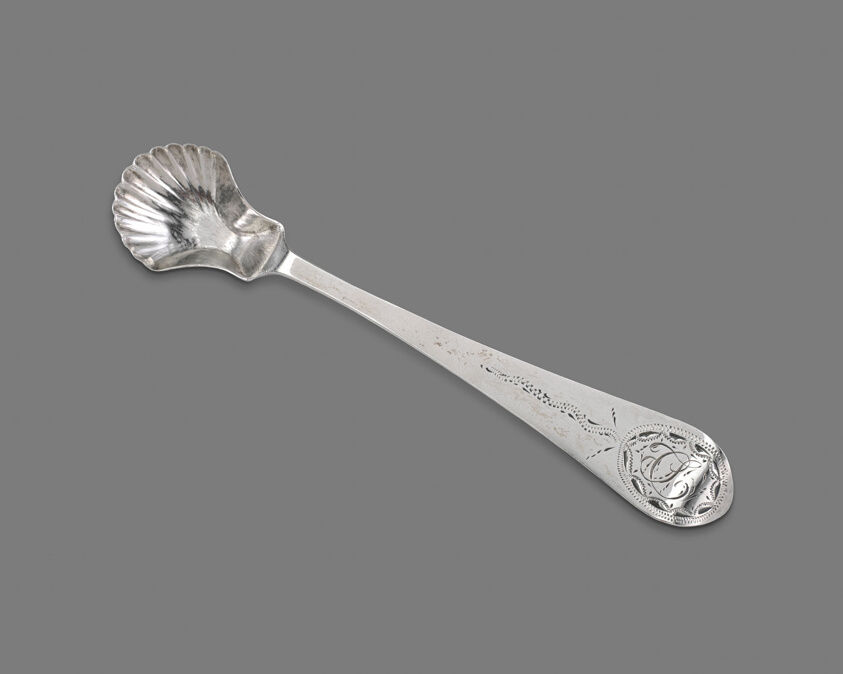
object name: Metalwork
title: Pair of Salt Spoons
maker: John Samuel Krause (American, 1782–1815); Bethlehem, Pennsylvania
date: 1805–15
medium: Silver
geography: Bethlehem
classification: spoon; silver; utensil; american decorative arts; american arts; decorative arts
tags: spoon